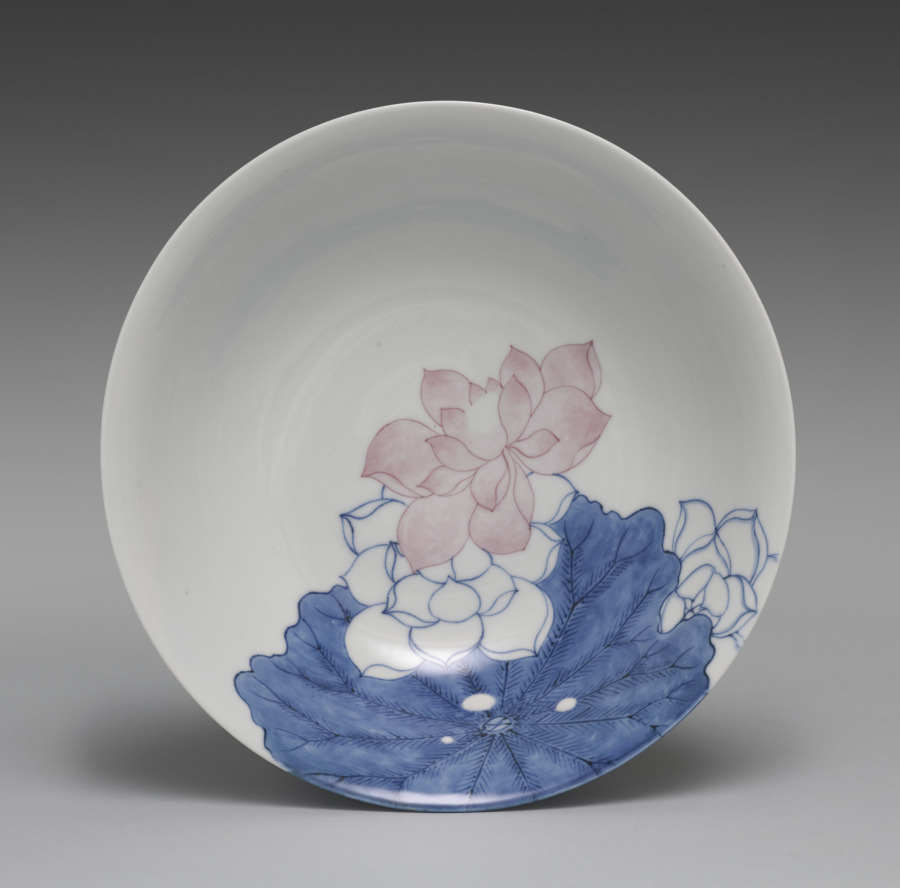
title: High-Footed Bowl with Lotus Pond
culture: Japan, Meiji period (1868–1912)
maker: Seifū Yohei III (Japanese, 1851–1914)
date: 1887–92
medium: Porcelain with underglaze color and modeled designs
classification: Ceramic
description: Seifū Yohei III was the most prominent head of a ceramics studio in Kyoto that specialized in Chinese-style porcelains and especially items for use in sencha (煎茶), or the drinking of steeped-leaf tea with companions. Sencha was popular among the bunjin of Kyoto and Osaka, who often enjoyed it as part of their emulation of Chinese culture. While sencha was by design less formal than the Japanese tea ceremony, it still featured the display of treasured objects. Prized Chinese antiquities were generally unobtainable, so substitutes such as the Gu-Shaped Flower Vase, CMA 2022.224, were much in demand. Bowls for distributing sweets, like this one, were also a staple of sencha gatherings.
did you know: This high-footed bowl simulates exploration of a pond both from underwater and from the sky.